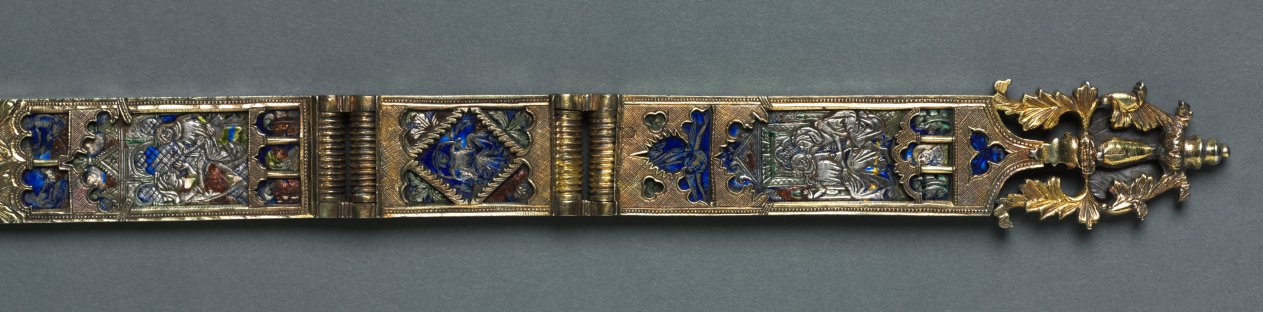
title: Belt for a Lady's Dress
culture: Italy, Siena(?)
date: c. 1375–1400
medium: basse-taille enamel and gilding on silver, silver thread, gilt-silver buckle, cast and chased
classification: Jewelry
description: Because of its extraordinary richness, this belt (also known as a girdle) was both an ornament for the body and an object of great personal luxury. Almost eight feet in length, belts like this were at the height of fashion for both men and women. After being passed around the waist and through the buckle, one end of the belt would fall to the hem of the garment. The belt's many colorful enamel plaques are worked in translucent enamel over decoration engraved into the silver beneath (an enameler's technique known as basse-taille). Within the plaques and cast into the buckle are scenes of courtly love, musicians, and fantastic animals. A large number of translucent enamels were made for secular objects during the late Middle Ages for use on jewelry, cups, garment clasps, and similar objects. This belt is a rare survival among these now scarce objects.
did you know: Look closely at the tiny scenes of courtly love on the plaques that adorn this belt. Given their size, these scenes were designed for the enjoyment of the woman who wore this belt over a sumptuous dress rather than an admirer from a distance.